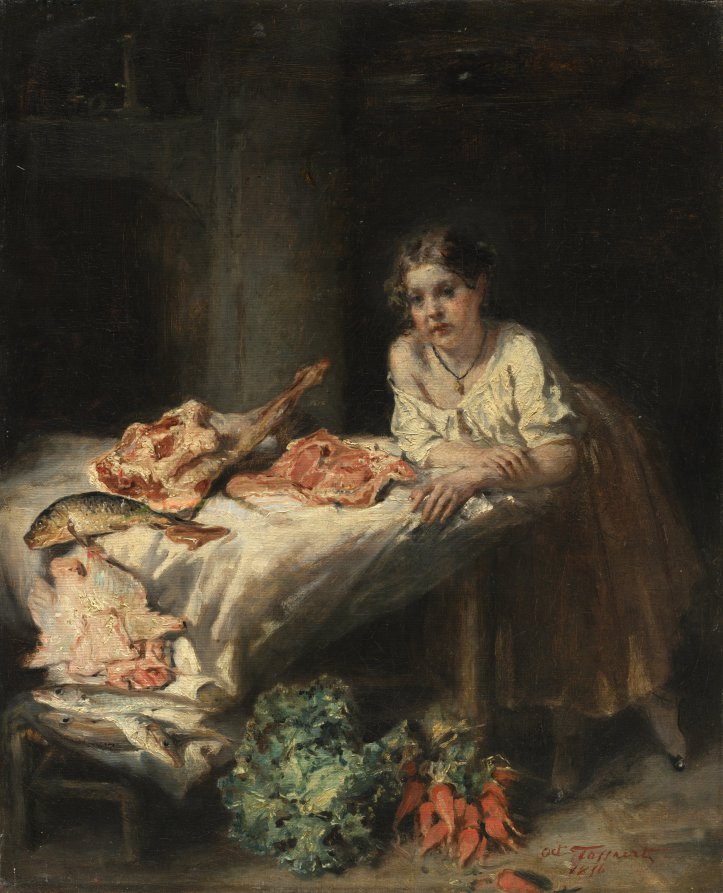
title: The Bourgeois' Kitchen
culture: France, 19th century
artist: Octave Tassaert (French, 1800–1874)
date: 1854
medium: oil on fabric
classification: Painting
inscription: Signed lower right: Oct Tassaert / 1854